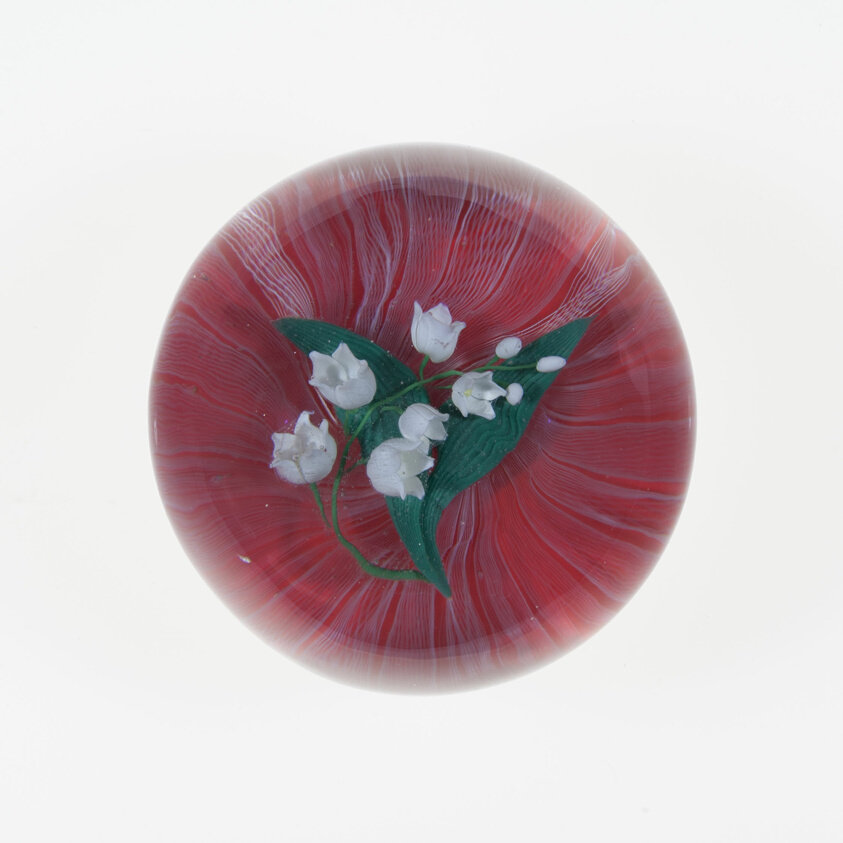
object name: Glass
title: Paperweight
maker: France or Czech Republic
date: c. 1870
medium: Glass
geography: France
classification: paperweight; lampwork; european decorative arts; glass